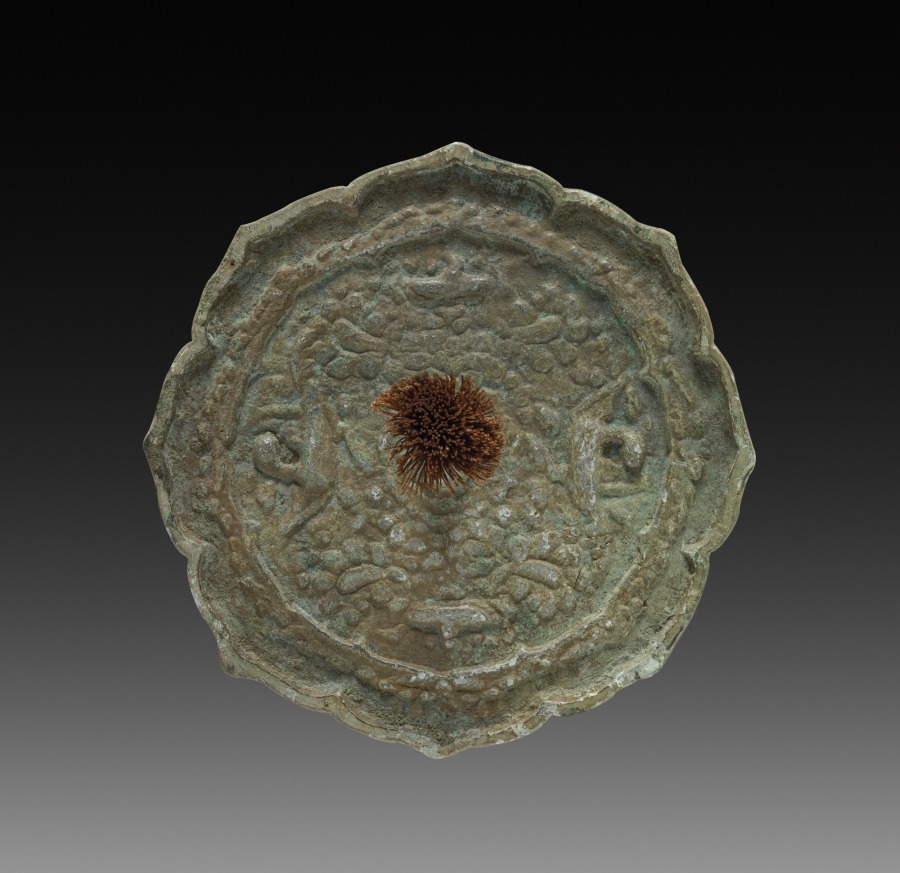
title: Mirror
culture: Japan, Heian period (794–1185)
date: 794–1185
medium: bronze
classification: Metalwork